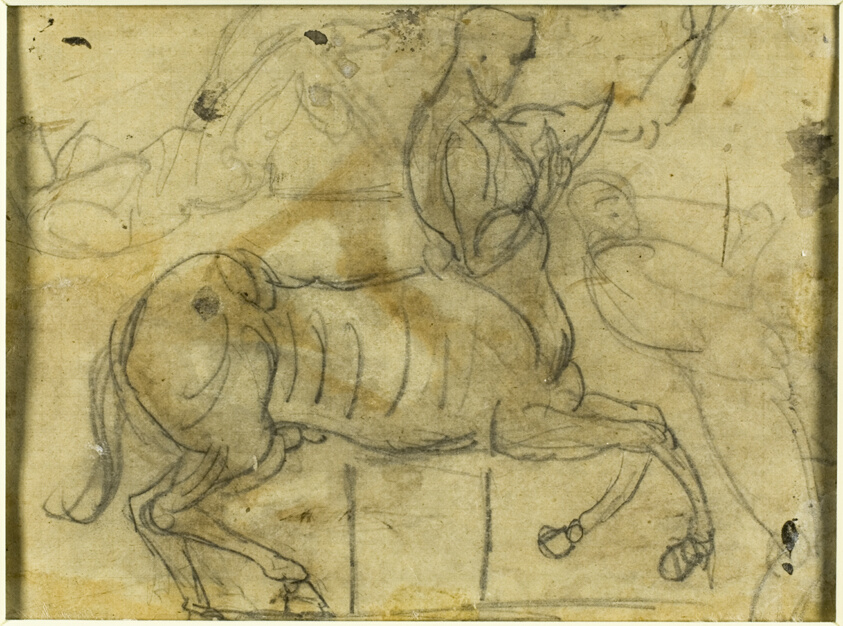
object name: Drawing and Watercolor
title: The Witches' Sabbath (recto); Sketches of Centaurs (verso)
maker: Auguste Rodin (French, 1840-1917)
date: 1883/89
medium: Gouache, with pen and black ink, over graphite (recto), and graphite (verso), on tan wove paper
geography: France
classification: gouache; drawings (visual works); prints and drawing